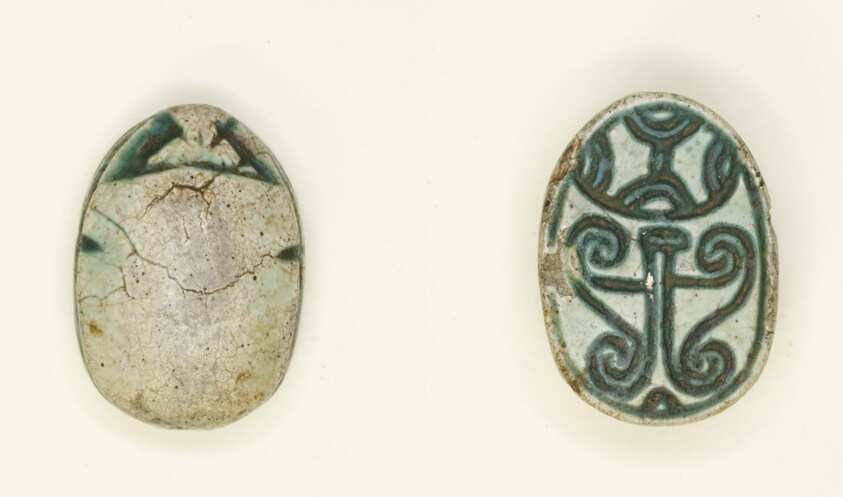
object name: Costume and Accessories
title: Scarab: Unlinked Scrolls and Spirals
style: second intermediate period, hyksos, fifteenth dynasty, ancient, egyptian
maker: Egyptian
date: Second Intermediate Period, Dynasty 15 (about 1650–1550 BCE)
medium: Glazed steatite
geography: Egypt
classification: scarab; ancient art; costume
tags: scarab beetle, spirals, scrolls (motifs)